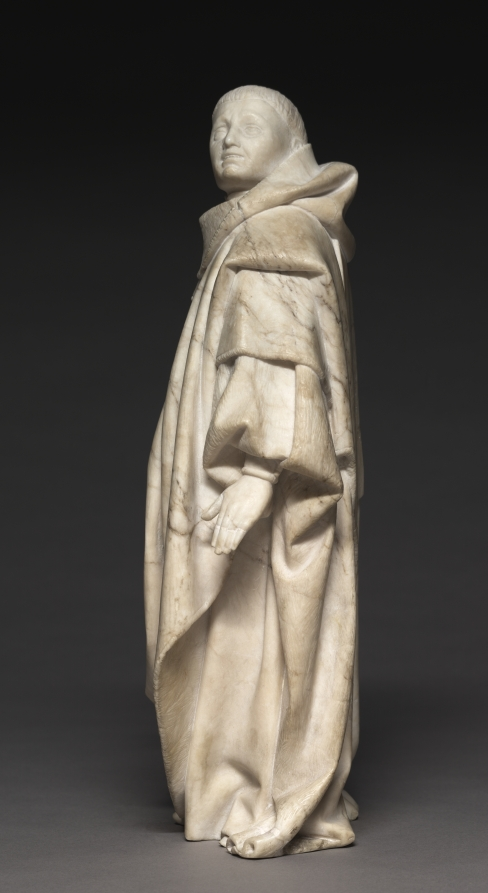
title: Mourner from the Tomb of John the Fearless and Margaret of Bavaria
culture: Spanish, Burgundy, Dijon, 15th century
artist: Jean de la Huerta (Spanish, active Burgundy, 1431–62)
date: 1443–45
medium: salins alabaster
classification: Sculpture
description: This monklike figure has a variously textured monochrome surface. Alabaster’s softness made it easy to carve details like the fabric and fur of the mourner’s robe and the codex pages in his hand. This is one of 40 mourners from an elaborate funeral procession beneath an intricately carved alabaster arcade. This mourner comes from the monastery of Champmol near Dijon, which became a primary burial place for Burgundian dukes. The sculpture was part of the tomb of John the Fearless (1371–1419), commissioned by his son Philip the Good (1396–1467), modeled after the earlier monument for Philip the Bold.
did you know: A plaster cast of this mourner adorns the Tomb of John the Fearless and Margaret of Bavaria in Dijon, France.